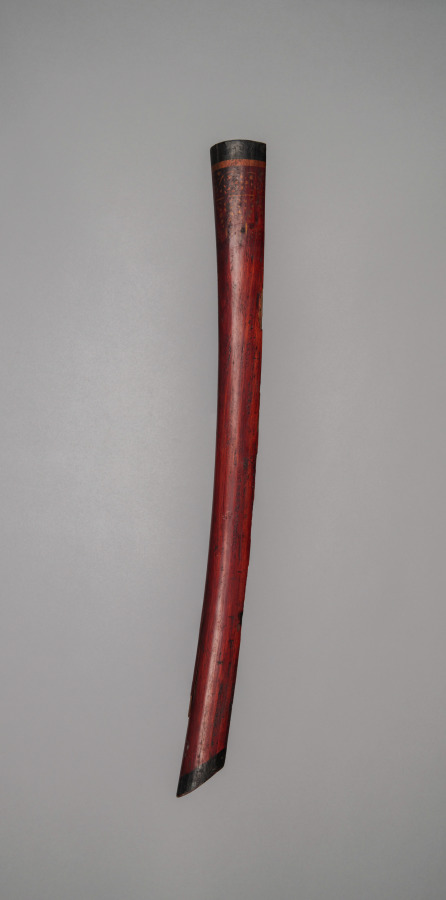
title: Scabbard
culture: Indonesia, Sulawesi (Celebes)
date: before 1918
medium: metal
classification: Arms and Armor